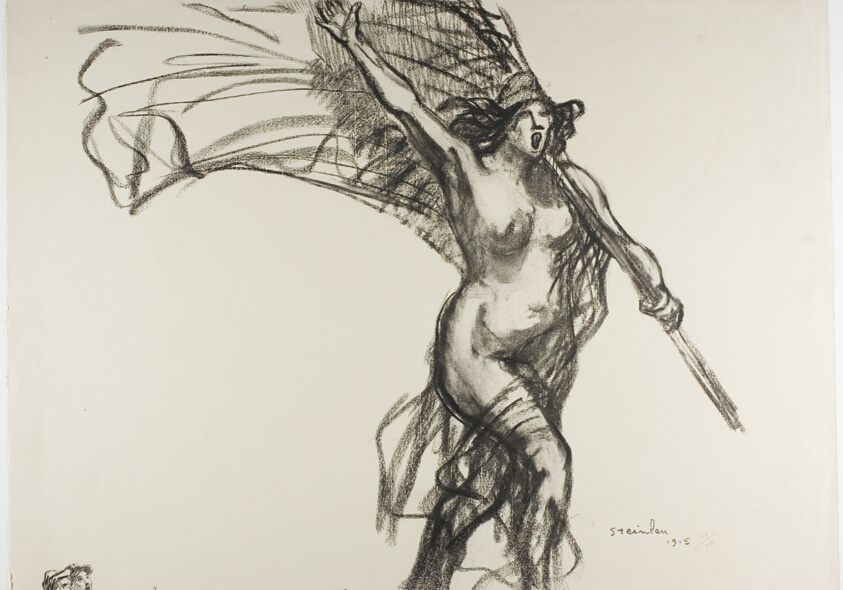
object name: Print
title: The Republic Calls Us..., plate fifteen from Actualités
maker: Théophile-Alexandre Steinlen; French, born Switzerland, 1859-1923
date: 1915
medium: Lithograph in black on ivory laid paper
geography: France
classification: lithograph; print; prints and drawing